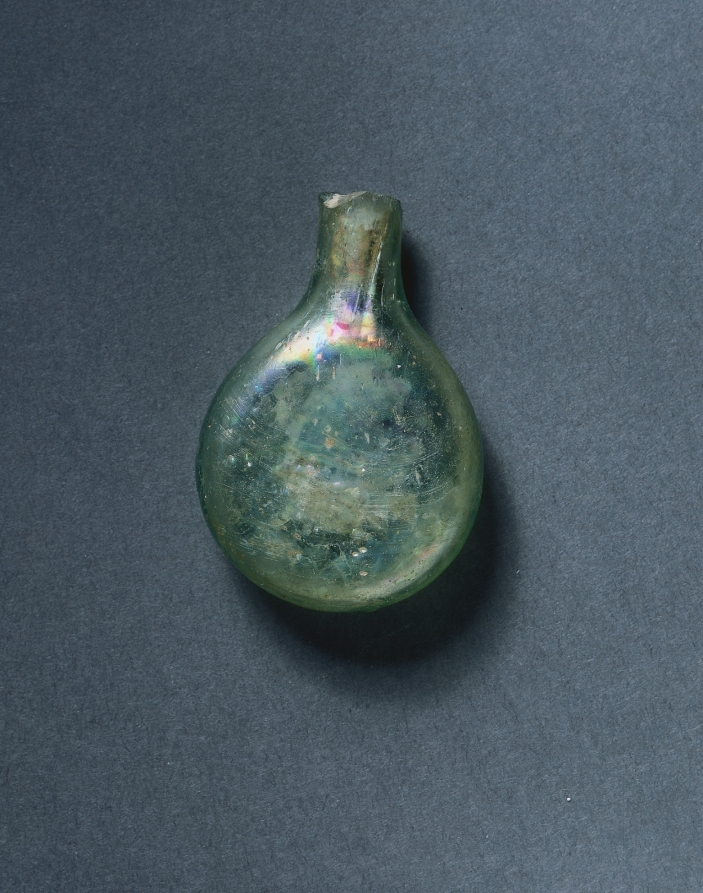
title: Pilgrim's Flask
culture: Byzantium, Syria-Palestine, 6th-7th century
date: 500–700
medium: green glass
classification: Glass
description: Ampullae (small flasks) from pilgrimage sites were made of metal, terracotta, or glass. Because of their fragility, glass ampullae survive less abundantly than the other materials.